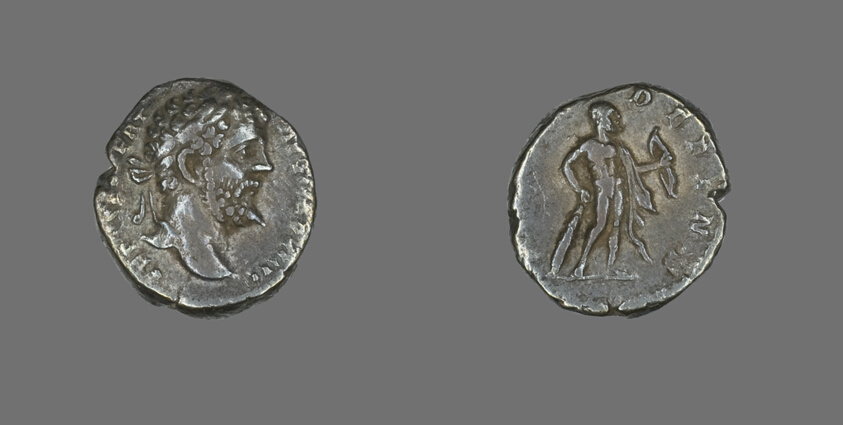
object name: Coin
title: Denarius (Coin) Portraying Emperor Septimius Severus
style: roman (ancient, style or period)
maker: Roman, minted in Rome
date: 197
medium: Silver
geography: Roman Empire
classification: coin; ancient art